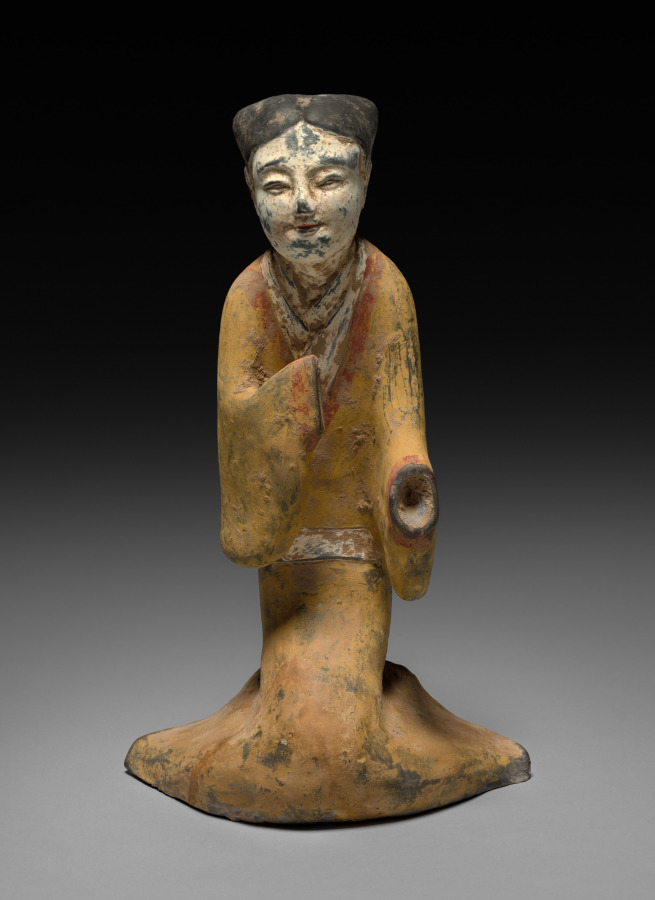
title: Kneeling Woman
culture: China, Western Han dynasty (206 BCE–8 CE) to Eastern Han dynasty (25–220 CE)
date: 100 BCE–100 CE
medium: painted earthenware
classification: Sculpture